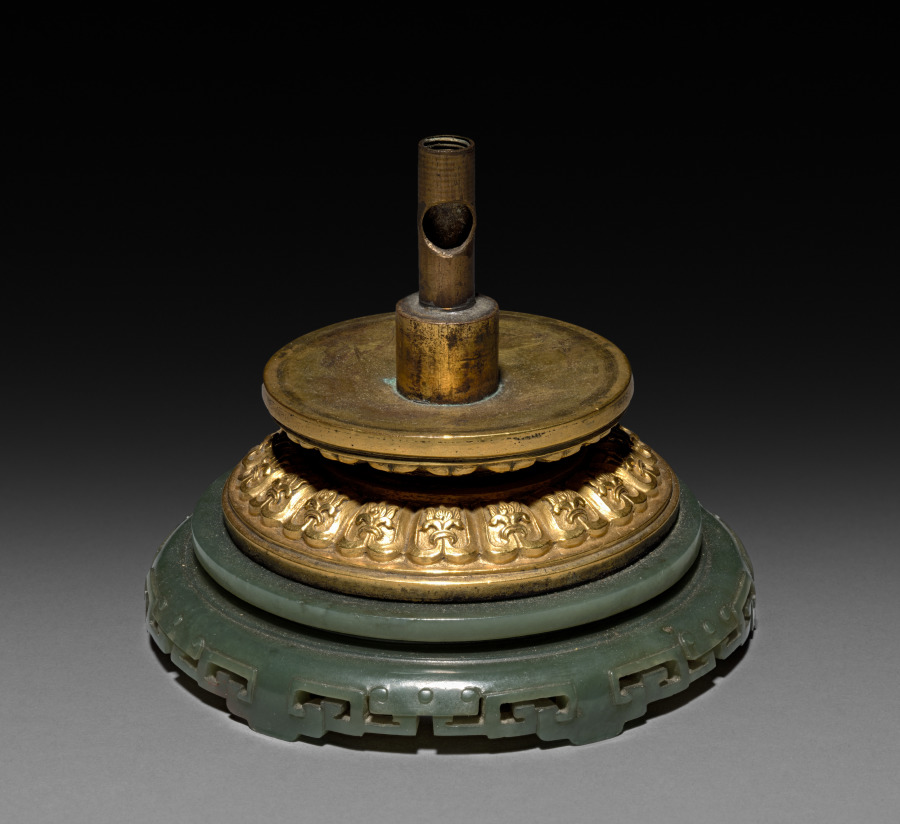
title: Cylinder (base)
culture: China, Qing dynasty (1644-1911) or Republican period (1912-49)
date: 1800–1940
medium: carved jade and gilt bronze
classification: Jade